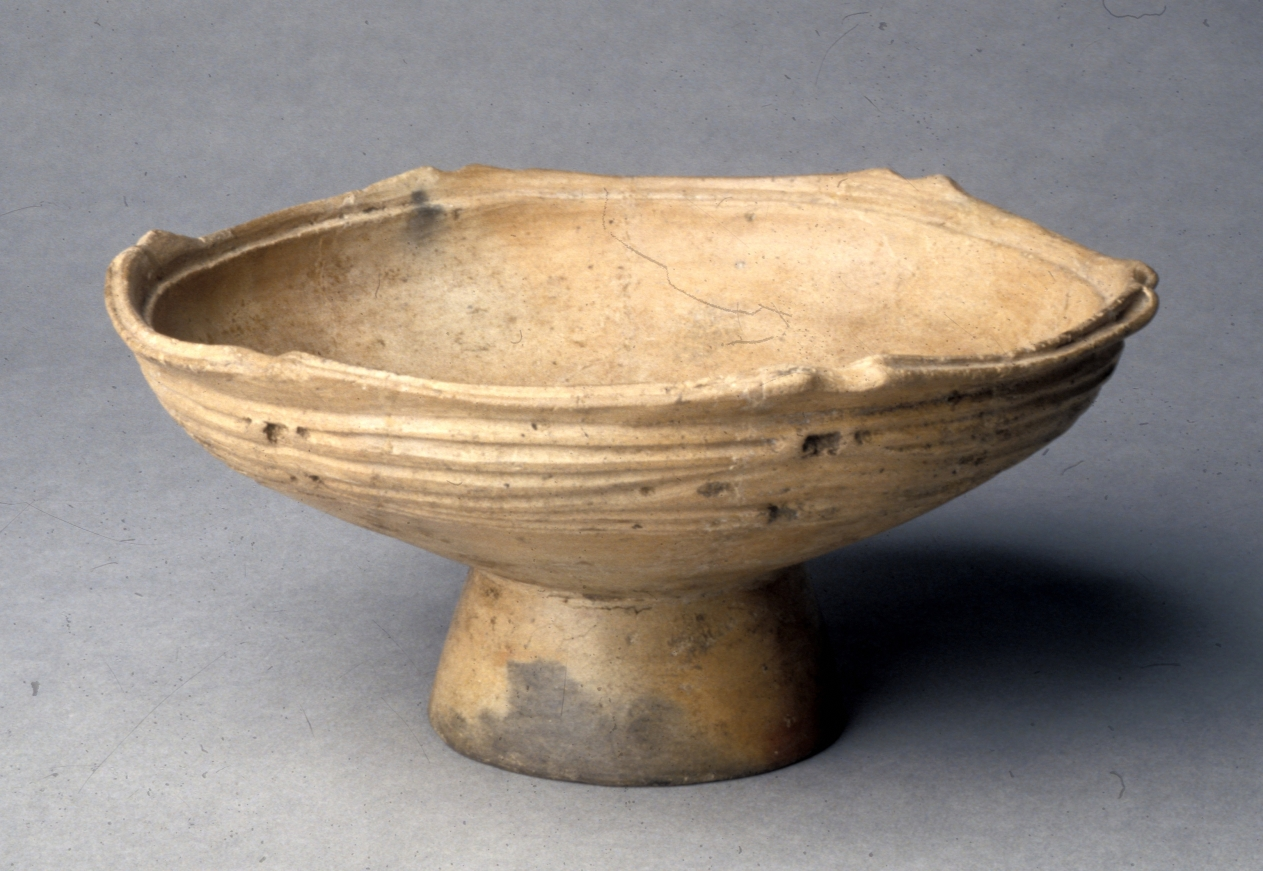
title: Pedestalled Dish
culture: Japan, Jōmon period (c. 10,500–300 BCE)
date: c. 1000–500 BCE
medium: burnished earthenware with carved and impressed decoration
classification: Ceramic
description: The Jomon period (10,500-300 BC) marks the beginning of the Japanese ceramic tradition, one of the most vibrant in world history. Major features such as an emphasis on asymmetrical silhouettes, great attention to surface texture, technological simplicity, and ambivalence to bright color already appear in this era. Late Jomon vessels are typically formed of a dense clay paste, and during this period, smaller serving vessels appear, in contrast to earlier deep storage or cooking vessel shapes. New types of surface decoration-carved rather than impressed into the clay body-herald the arrival of a distinctive aesthetic. The attachment of the pedestal to this shallow bowl, as well as the vessel's rather thin walls, also identify a new stage in ceramic production in Japan.